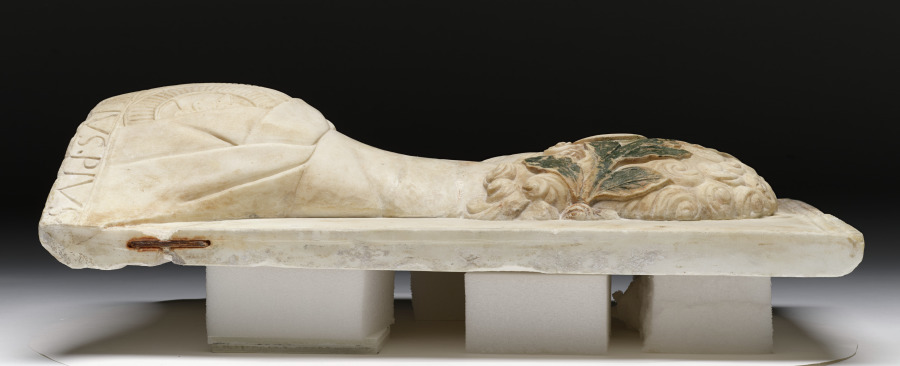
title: Aurelius Antoninus Pius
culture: Italy, Lombard School, late 15th century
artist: Gregorio di Lorenzo (Italian, c. 1436–1504)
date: late 1400s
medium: marble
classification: Sculpture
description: A laurel wreath rests on this Roman emperor’s finely articulated corkscrew curls, underscoring his military triumphs. While many ancient and classically inspired marble sculptures were painted, the survival of pigments is rare. In addition to the vibrant green coloring, traces of gold also remain on the leaves.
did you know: The artist can be identified by his distinctive flame-shaped curls forming the beard.